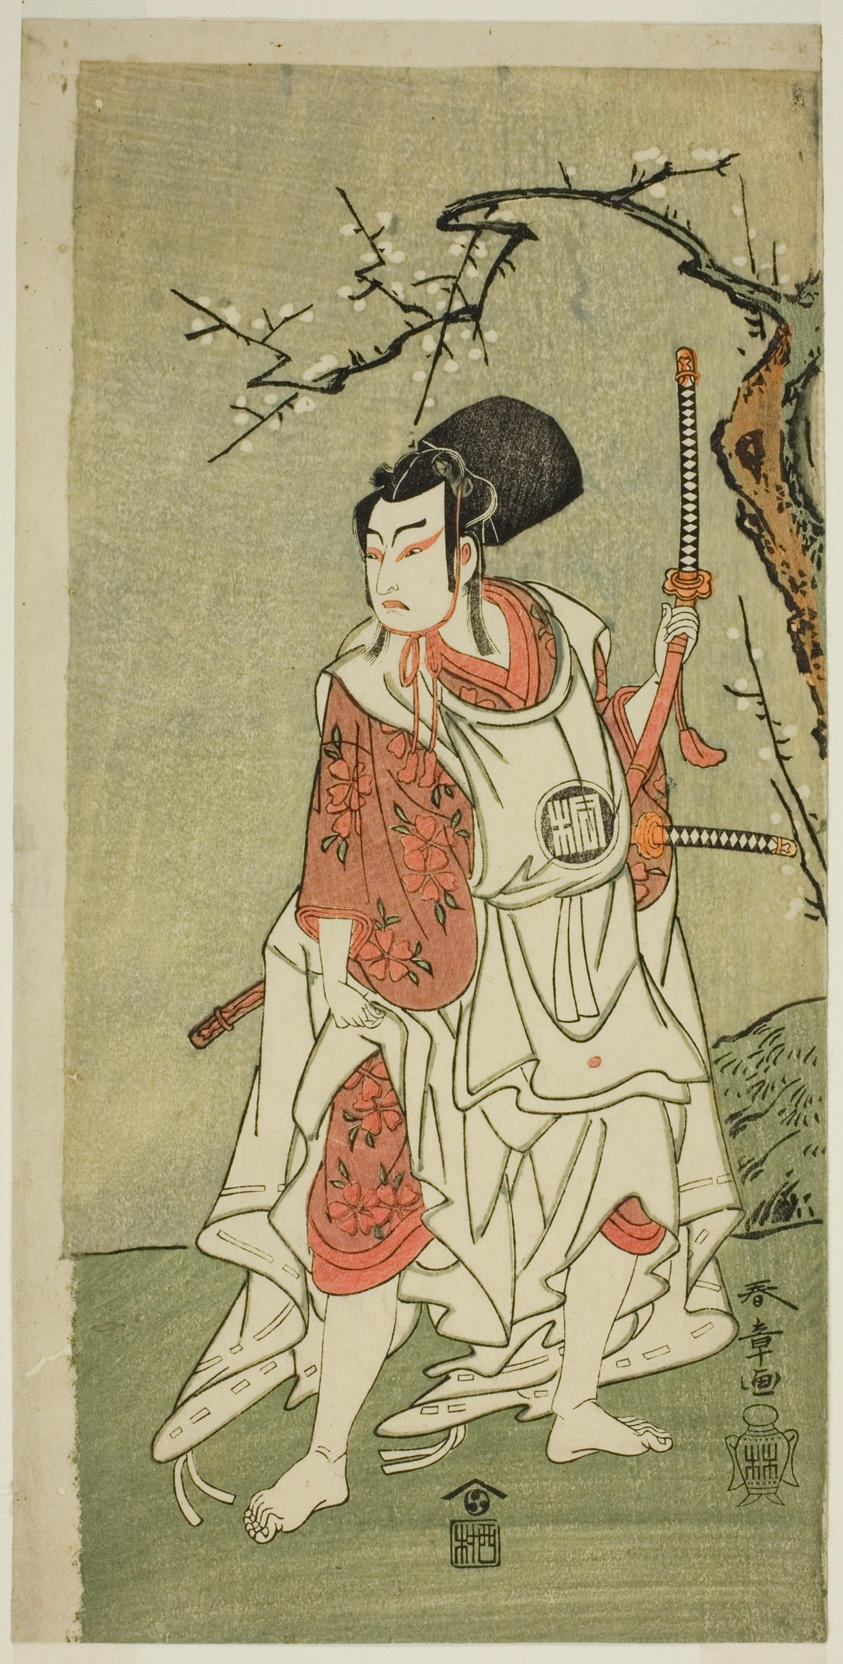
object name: Print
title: The Actor Arashi Sangoro II as Sakura-maru in the Play Sugawara Denju Tenarai Kagami, Performed at the Ichimura Theater in the First Month, 1772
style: Japanese (culture or style)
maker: Katsukawa Shunsho 勝川 春章; Japanese, 1726-1792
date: c. 1772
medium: Color woodblock print; hosoban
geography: Japan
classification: woodblock print; print; asian art